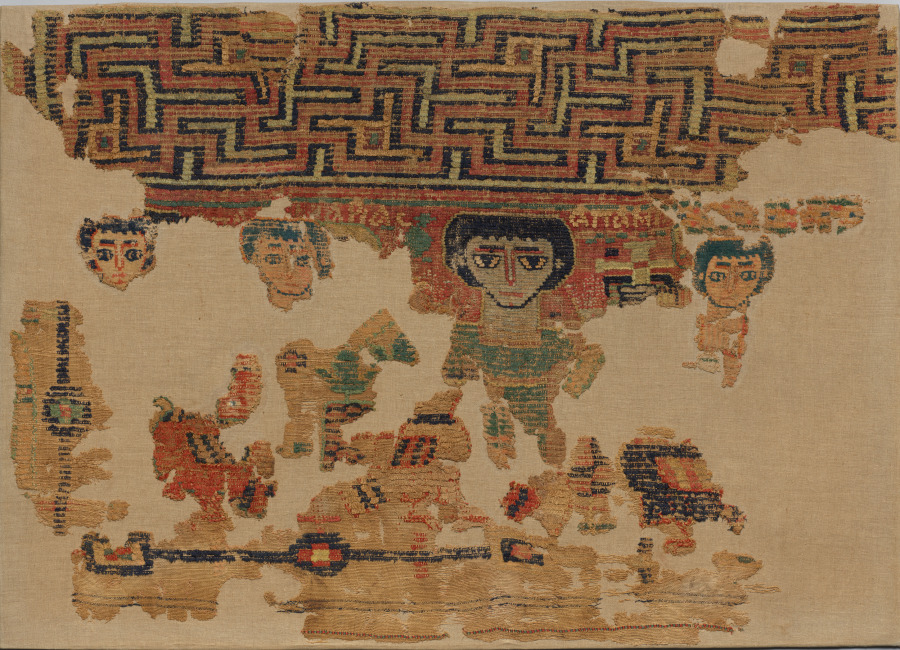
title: Fragment of a Large Hanging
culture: Egypt, Byzantine period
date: 500s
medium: looped-knot pile; wool and linen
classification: Textile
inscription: above and on both sides of the main figure are fragmentary bits of Coptic inscriptions reading: "ATTAC. . ." (left) and "ATTA . . ." (right).